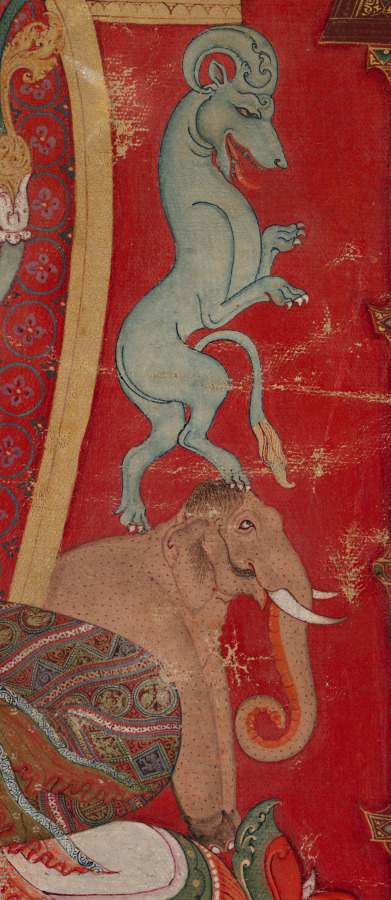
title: Green Tara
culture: Central Tibet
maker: attributed to Aniko (Nepalese, active in Tibet mid- to late 1200s)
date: c. 1260s; mounted, 2020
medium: thangka; gum tempera, ink, and gold on sized cotton; mount: silk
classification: Painting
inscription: Om Ah Hum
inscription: om tare tutare ture svaha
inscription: Om Ah Hum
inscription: Om Ah Hum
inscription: om ah sarva vyida svaha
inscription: ye dharmā hetuprabhavā he- tuṃ teṣāṃ tathāgato hy avadat teṣāṃ ca yo nirodha evaṃvādī mahāśramaṇaḥ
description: For Tibetans, Green Tara is one of the preeminent figures of their Buddhist faith, a radiant savioress who embodies the female form of the perfect, enlightened mind. The Green Tara in the Cleveland thangka—a Tibetan devotional painting on cloth—specifically dispels fear and provides protection, just like her mantra inscribed on the back side of the painting. Her green color and fear-not gesture link her to the cosmic Buddha of the North, enshrined above her head. Most scholars agree that this work was painted by the celebrated Nepalese artist known as Aniko.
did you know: The tiny monastic figure under Green Tara's right hand commissioned the painting.